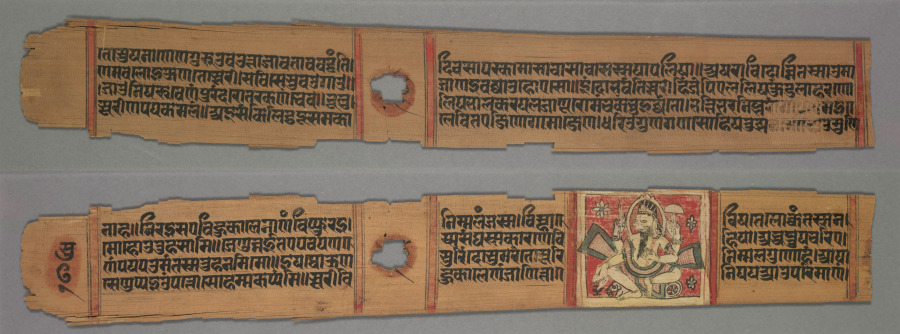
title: Folio from a Kalpa-sutra and Story of Kalakacharya of Devachandra: Text (recto); Brahmanshanti Yaksha (verso)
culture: Western India, Gujarat, 13th century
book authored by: Devachandra (Indian)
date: 1279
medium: gum tempera and ink on palm leaf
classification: Painting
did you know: This page is from the end of the Story of Kalakacharya, when Kalaka dies by fasting.